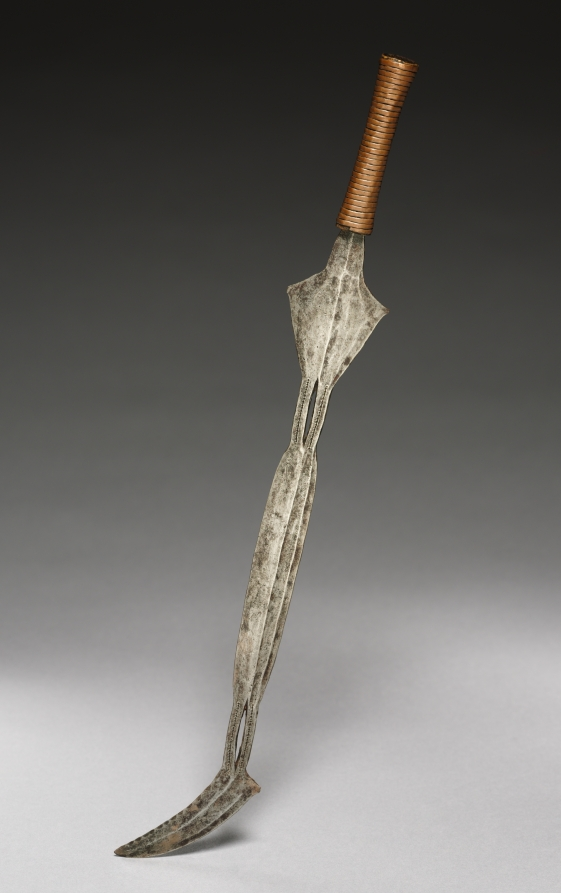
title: Knife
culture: Africa, Central Africa, Democratic Republic of the Congo or Central African Republic, unknown maker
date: before 1916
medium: forged iron and copper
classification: Arms and Armor